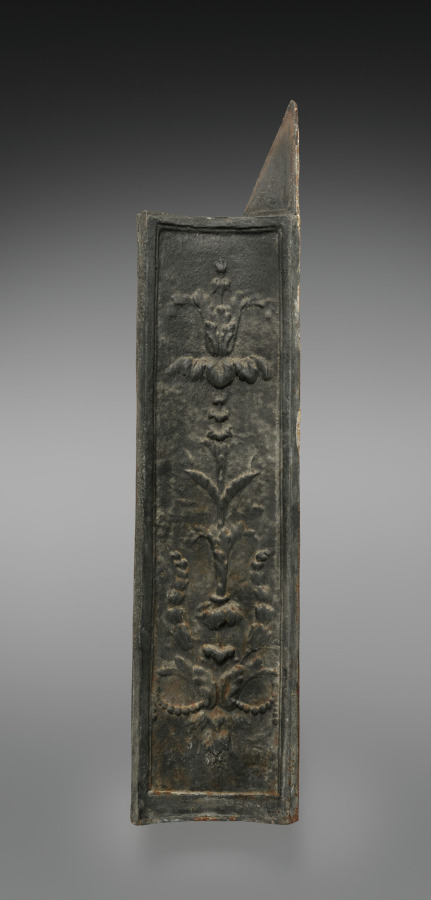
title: Set of Fire Linings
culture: France, style of Louis XVI, 18th Century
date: c. 1770–1780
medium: cast iron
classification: Furniture and woodwork